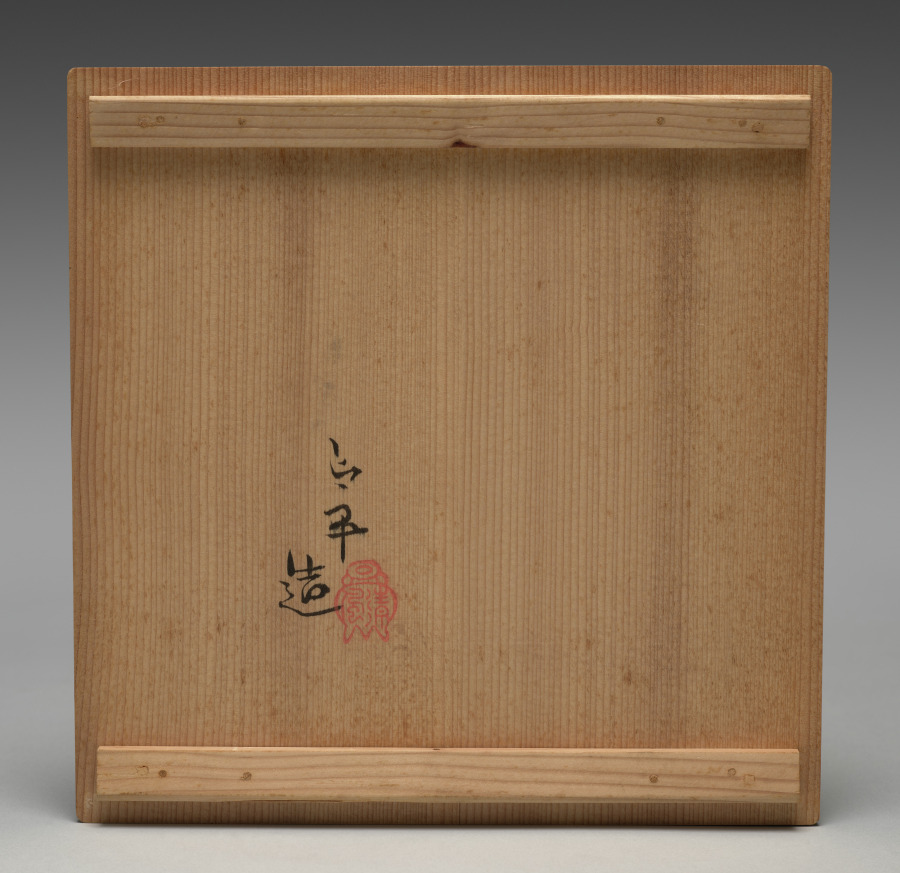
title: Sake Pourer with Chrysanthemum, Orchid, and Plum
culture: Japan, Meiji period (1868–1912)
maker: Seifū Yohei III (Japanese, 1851–1914)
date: c. 1887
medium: Porcelain with underglaze blue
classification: Ceramic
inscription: Artist's signature in underglaze blue on the base.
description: Seifū Yohei II and his successor, Seifū Yohei III, trained in ink painting. Their brush skills are seen in their underglaze cobalt blue designs. Orchid, bamboo, chrysanthemum, and plum, appearing on Yohei III’s sake pourer, are known as the Four Gentlemen. They symbolize the virtues of humility, integrity, endurance, and perseverance.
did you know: This sake pourer is decorated with the Chinese theme of the Four Nobles, in which the qualities of a good person are represented by plant.